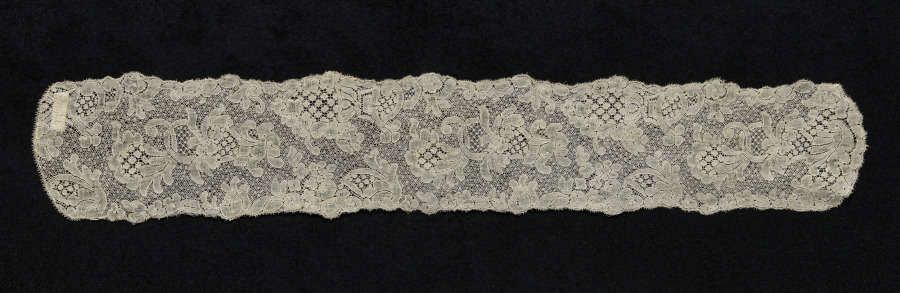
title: Lace Lappet (one of a pair)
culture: Belgium, Mechelen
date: 1700s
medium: Linen: bobbin lace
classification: Lace